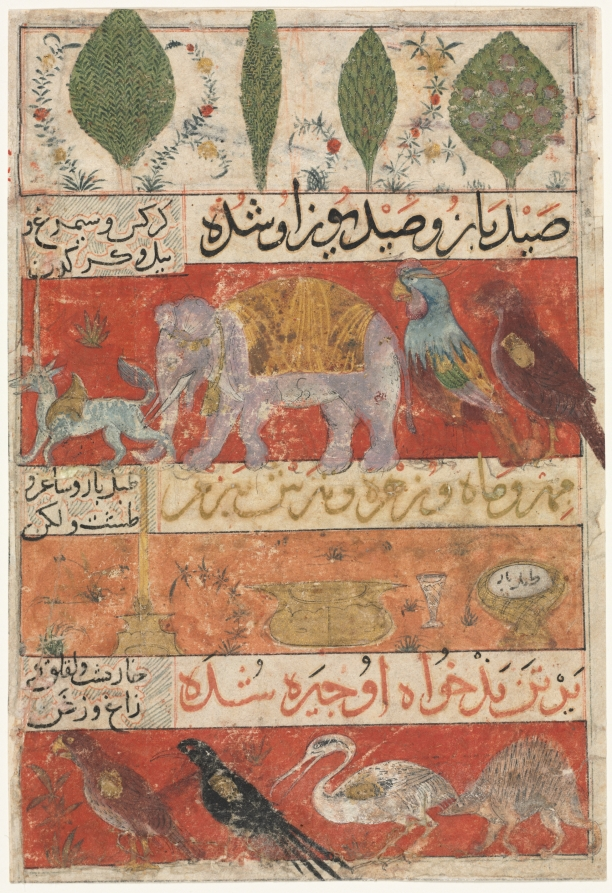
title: Animals, Birds, and Plants (verso) from a Mu'nis al-Ahrar fi Daqa'iq al-Ash'ar (The Free Men's Companion to the Subtleties of Poems) of Muhammad Ibn Badr al-Din Jajarmi (active 1340s)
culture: Iran, Shiraz, Ilkhanid period (1256-1353)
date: c. 1341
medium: opaque watercolor, ink, and gold on paper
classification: Manuscript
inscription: script: Thulth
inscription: Making the garden of his pleasure their homeland are:/ Rosebush and box-tree, cypress and elm./ Prey to hawk and prey to his cheetah are:/ Vulture and sīmurgh, elephant and rhinoceros./ Sun and Moon, Venus and Mercury are at his feast:/ Falcon-drum and goblet, bowl and candlestick./ Overwhelming the corpses of his foes are:/ Porcupine and stork, raven and kite.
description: This is one of several pages that were removed from a unique manuscript of this otherwise unknown work, which bears a colophon stating that it was written by the author and finished "Ramadan, 741" (February 1341). Illustrations on both sides include various animals, trees, and objects such as weapons, musical instruments, and jewels.